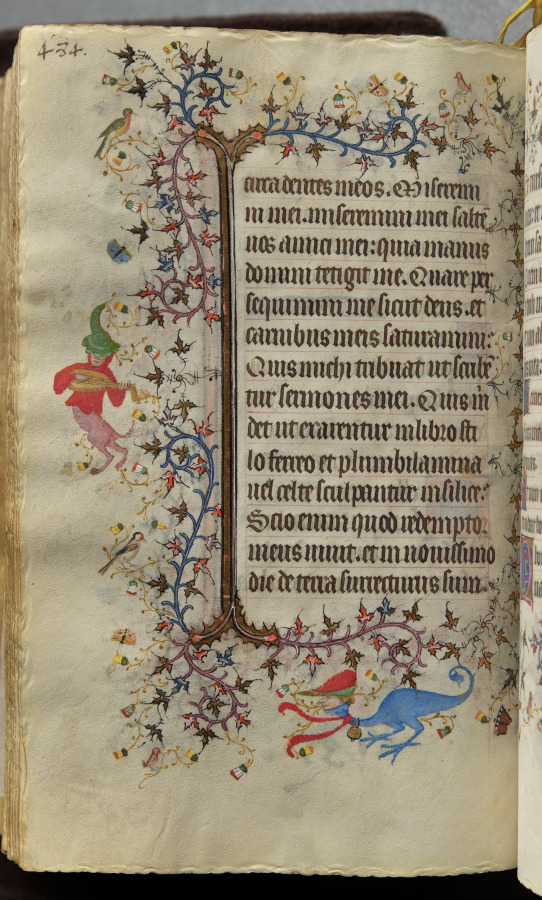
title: Hours of Charles the Noble, King of Navarre (1361-1425): fol. 236v, Text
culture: France, Paris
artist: Master of the Brussels Initials and Associates (French)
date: c. 1405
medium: ink, tempera, and gold on vellum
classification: Bound Volume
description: This precious volume was obviously highly prized by its owner, the French-born King of Navarre, who had his coat of arms painted on no less than twenty folios. Rather than directly commissioning this manuscript from a specific workshop, it seems that Charles the Noble acquired his book of hours -- perhaps ready-made for the luxury market -- while on a trip to Paris in 1404-05. A collaborative effort, six painting styles are evidenced within the pages of this codex, those of two Italians, two Frenchmen, and two Netherlanders. The painter who was responsible for the planning and decoration of the book, and who produced seventeen of the large miniatures, was a Bolognese artist known as the Master of the Brussels Initials. His principal assistant, responsible for most of the borders, was a Florentine who signed his name "Zecho" da Firenze on folio 208 verso.